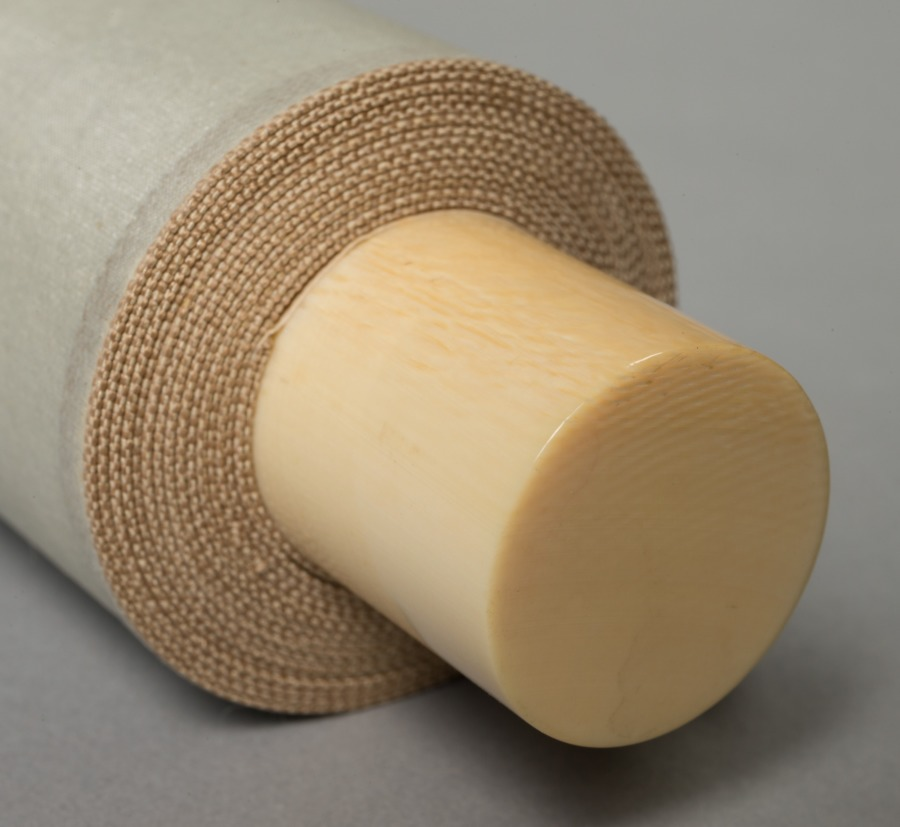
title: Aged Pine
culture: Japan, Edo period (1615–1868)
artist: Nakayama Kōyō (Japanese, 1717–1780)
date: 1717–80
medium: hanging scroll; ink on paper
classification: Painting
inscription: Artist's inscription and seal, lower right.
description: The ancient pine is an admired subject in Asian painting and symbolizes the desirable human qualities of wisdom and solid moral character.